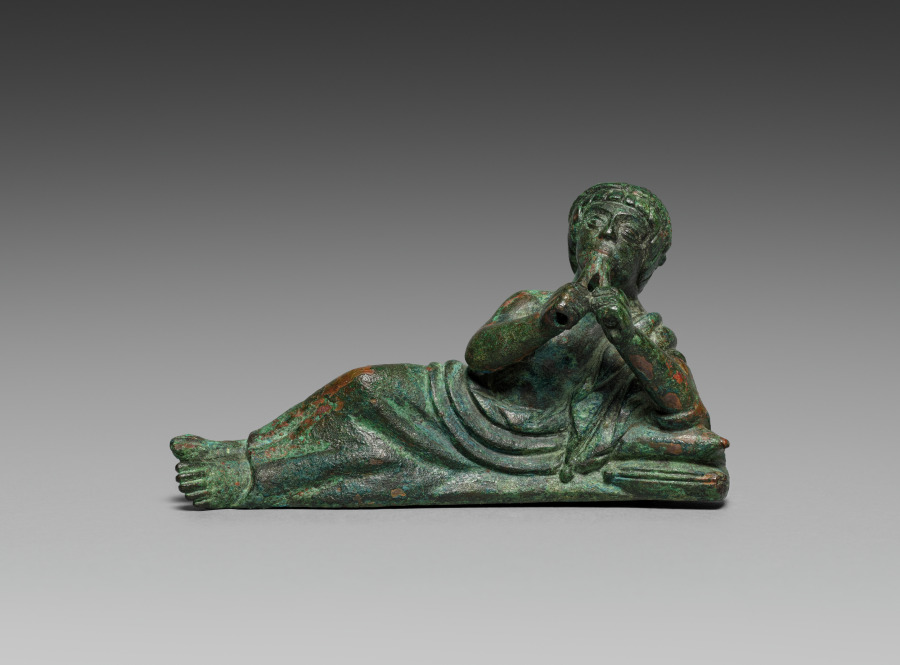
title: Vessel Ornament of Reclining Pipes Player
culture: Etruscan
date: probably 400–375 BCE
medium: bronze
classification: Sculpture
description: This bronze banqueter figurine was one of six once adorning the rim of a large basin, now lost. Cast in molds with individualized details, most have grooves on their underside to attach to the basin. Minute traces of gilding remain on areas of clothing and skin (mostly visible only under magnification), suggesting that they may have been completely gilded. Two handles in the form of hippocampi, horses with serpentine tails, also belonged to the basin and are now displayed at the Michael C. Carlos Museum at Emory University. The basin may have been used to hold liquid for a banquet, or was perhaps funerary. This bronze reclining figurine raises his head and blows into a set of pipes. The tips of the pipes are broken off. Some gilding remains on the mouth and chin. The figurine wears a himation over his body and has a bare chest. Two pillows prop up his left elbow. His hair falls over his forehead in square bangs.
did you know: Guests were often invited to play instruments and sing during symposia.